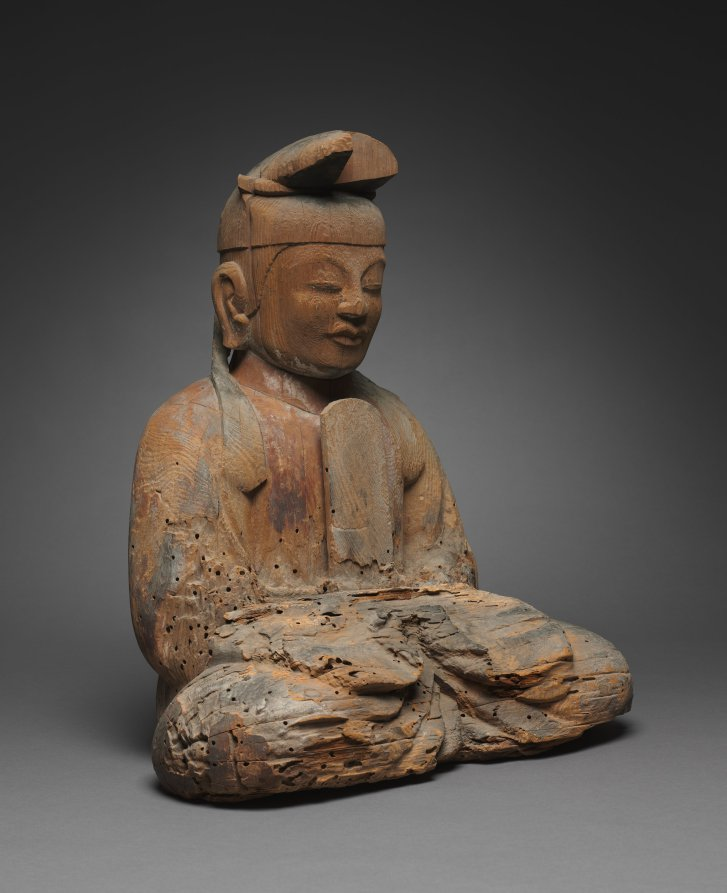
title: Shinto Deity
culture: Japan, Heian period (794–1185)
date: 900s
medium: wood, with traces of polychromy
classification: Sculpture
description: These sculptures represent kami, the name for deities associated with the Japanese religious tradition known as Shinto. They are said to have originally been created for the Usa Hachiman shrine in Oita on the island of Kyushu. Usa Hachiman Shrine houses four main kami: Hime Okami, who assists those engaged in agriculture and sea travel; the legendary 5th-century emperor Ojin deified as the kami Hachiman; Empress Jingu; and the kami of Mount Kawara, who aids copper miners. The identities of these two figures are unknown, but they belong to a larger group containing at least three other deities.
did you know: Traces of pigment on the surface of this sculpture indicate it was once painted.